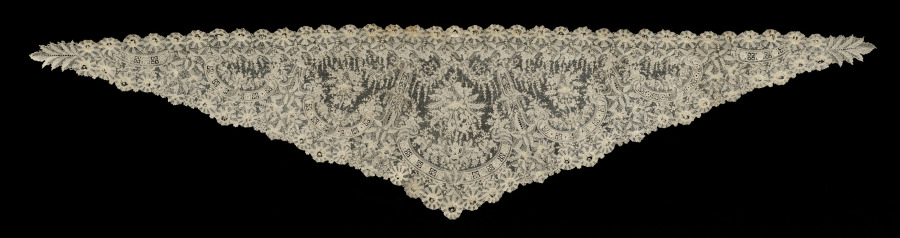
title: Lace Head Piece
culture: Belgium, Brussels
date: 1800s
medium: Needle lace (point de gaze)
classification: Lace